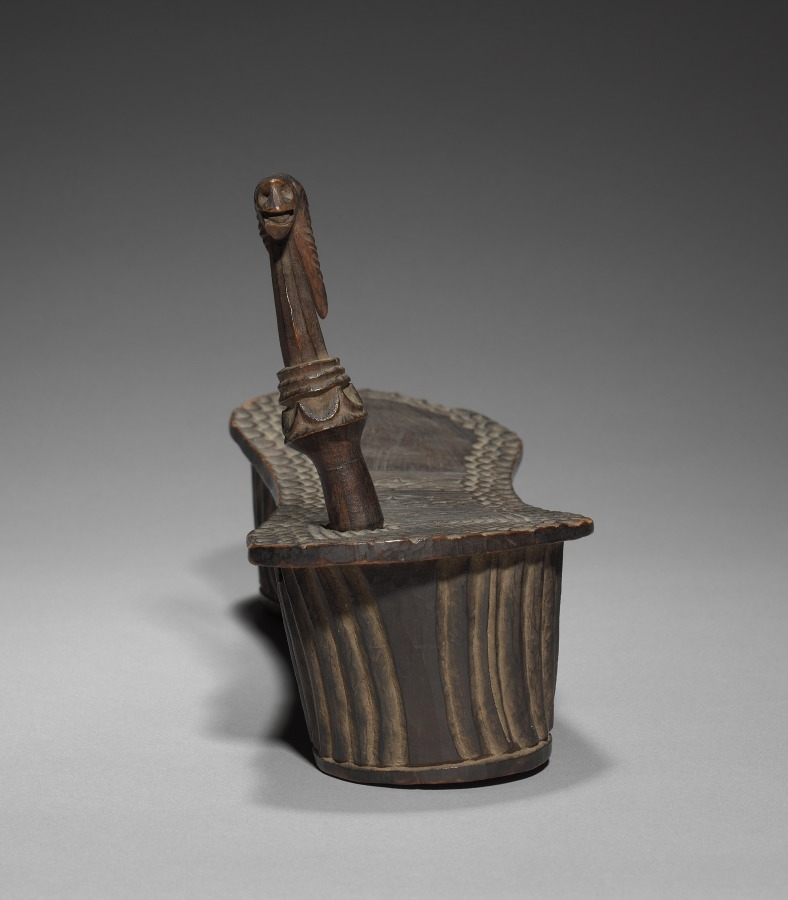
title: Sandal (mtalawanda / mtawanda) or Clog (kiatu cha mti)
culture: Africa, Central Africa, Democratic Republic of Congo, unidentified carver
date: c 1800s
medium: Wood and glass beads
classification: Wood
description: Common in the Indian Ocean region, wooden sandals changed meaning across place and time. This pair’s base elevates the foot as the toes grip an antelope-shaped peg (msuruaki). Crisp geometric sole designs suggest they were rarely worn. East African elites and merchants once had exclusive rights to wooden shoes, wearing elaborate ones only for portraits. Formerly enslaved people living along the coast wore simpler ones from the 1840s onward, adopting elite footwear to assert their liberation. However, slave traders like the Zanzibari “Tippu Tip” (c. 1832–1905) likely brought mitalawanda to Central Africa; stylistic elements of this pair hail from that region.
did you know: This distinctive footwear traveled from Southeast Asia and the Middle East to Africa, first to the Swahili Coast and then further inland to parts of Central Africa. The deity Krishna wears similar shoes (paduka) in an eighteenth-century Indian miniature painting (2003.344).